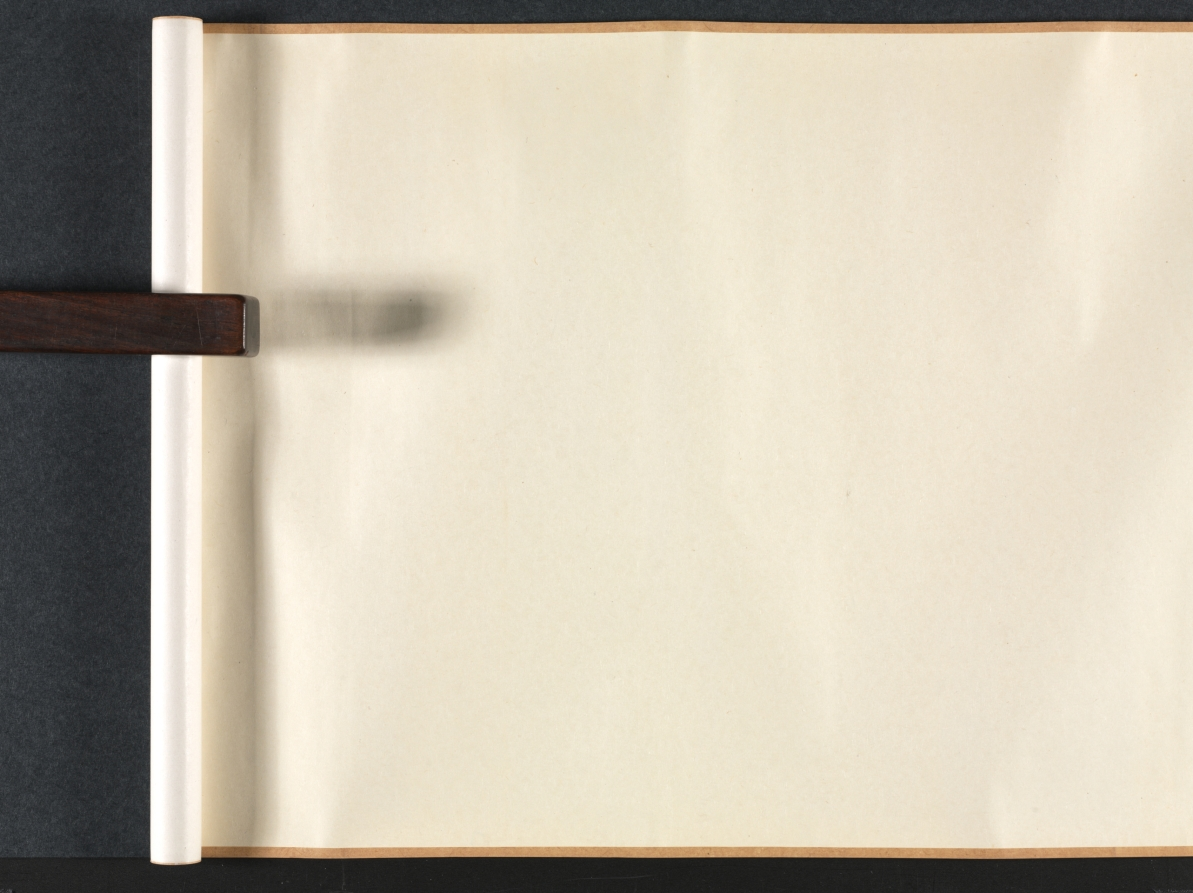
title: Hall of Lofty Pines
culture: China, Qing dynasty (1644-1911)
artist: Wang Hui (Chinese, 1632–1717)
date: 1703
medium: handscroll; ink and color on paper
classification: Painting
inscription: [題] 松喬堂圖 康熙癸未夏六月, 海虞耕煙散人王翬畫。[印]王翬之印; 石谷. [左下] 來青閣; 耕煙野老時年七十有二.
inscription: 松喬堂圖一卷，海虞石谷王君為靜海近公厲少司冦公作也。圖成于癸未之夏。未幾而公遂仙去。公令子今編修君南湖屬余題跋其後。余與公同官侍從，交契最深。側見公之清修純德，蔚為聖天子所眷重。侍直內廷，密勿贊襄，幾二十餘年。蒼生之所以受賜，士林之所以沐德者，天下莫能窺，在廷莫能悉。而公卒不言。以故宸衷日益契，恩禮亦日益渥。雖年逾懸車，時有歸老之念。而上固不聼公之去。其所謂松喬堂者，御書以賜公者也。蓋以松比公之清風勁節，而歲寒不改，經霜彌茂。則又以期公之壽考未有艾焉。公知此身未易乞，而山林槃磵之樂，止可寄諸寤思。此松喬堂圖之所由作也歟。石谷此圖，結構精密，筆墨超邁。其寫樹木之蒼蔚，堂宇之靚幽。恍見摩詰輞川樂天廬山之勝。獨惜公未得一日徜徉故園以償其願。即繪於圖亦未得以永其趣，此編修君之所以眷眷不忘也。雖然千歳之松喬，下蔭百畝，上以修棟梁之需。然則上當日名堂之意，不更望於後之人襲其芘而養其材也哉。吾願編修君之寶斯圖。并望君之塗塈丹雘，大其堂構也已矣。 康熈丙戍重陽三日，雲間王鴻緒跋。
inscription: 10 additional seals: 1 seal of Li Duna 勵杜納 (1628–1703); 4 seals of Zha Ying 查瑩 (jinshi of 1766); 5 seals of Li Yun (dates unknown).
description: Wang Hui 王翬, a leading painter in the orthodox school of the early Qing dynasty (1644–1911), was commissioned to paint this landscape with a country estate for Li Duna 勵杜納 (1628–1703), vice minister of justice in Emperor Kangxi’s court. The emperor had honored Li by granting him a piece of calligraphy with the name of Li’s retirement retreat, “Hall of Lofty Pines.” He drew a comparison between pines and Li’s upright character, resilience, and longevity. Wang Hui’s painting was supposed to allow Li to imagine living in a beautiful, secluded compound among the hills and pines. Sadly, Li died before seeing the completed painting and before receiving the emperor’s permission to retire. The landscape begins with peaceful riverbanks and low hills. The pines around the estate in the middle of the handscroll are truly lofty, some stretching even beyond the frame of the painting. Li Duna, the estate’s owner, is shown twice in his serene mountain retreat: first approaching the entrance to the compound with two servants at the right, and then later in the scroll, to the left, reading in the comfort of an inner room.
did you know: One servant carries the estate owner's carefully wrapped qin, a type of zither.